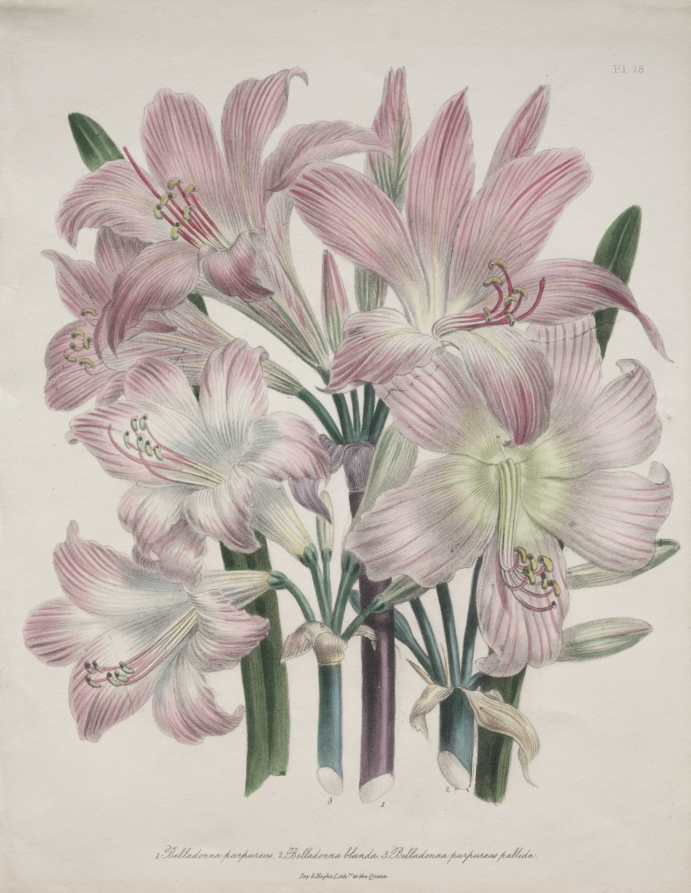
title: Belladonna Lily: Amaryllis belladonna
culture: England, 19th century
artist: Jane Loudon (British, 1807–1858)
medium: lithograph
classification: Print